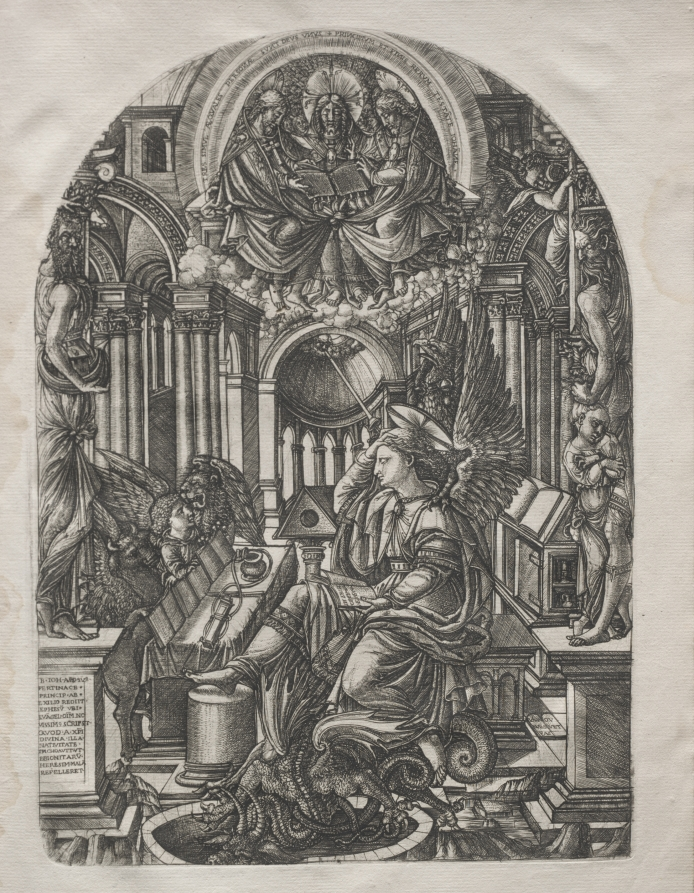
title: The Apocalypse: St. John on the Island of Patmos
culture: France, 16th century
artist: Jean Duvet (French, 1485–1561)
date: 1546–1556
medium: engraving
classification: Print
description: This print is part of a bound volume of works illustrating the a narrative of the Apocalypse, taken from the Revelation of Saint John in the Bible. The 23 engravings in the series occupied the artist for a number of years and represent his greatest artistic achievement. The museum's volume is one of only seven known complete sets. Jean Duvet was one of the first major printmakers in France and one of the most original artists of the 1500s. Although he worked mostly in the provincial city of Langres, he became aware of Italian art through the circulation of prints—notably those of Marcantonio Raimondi. His solidly modeled human figures reflect the influence of the Italian High Renaissance. Duvet, however, developed an idiosyncratic, highly artificial style with crowded compositions that ignore rational space in favor of ornamental surface patterns.